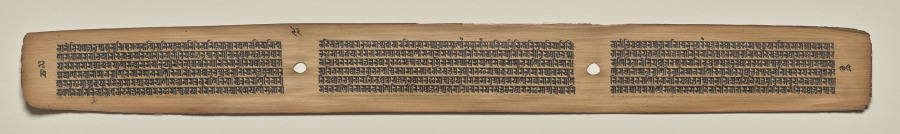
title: Text, Folio 93 (verso), from a Manuscript of the Perfection of Wisdom in Eight Thousand Lines (Ashtasahasrika Prajnaparamita-sutra)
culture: Eastern India, Bihar, Vikramashila Monastery. Painting: Nepal, Kathmandu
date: Sunday, September 14, 1119 (year 239 of the Newar Samvat in the month of Ashvina)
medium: gum tempera and ink on palm leaves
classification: Painting